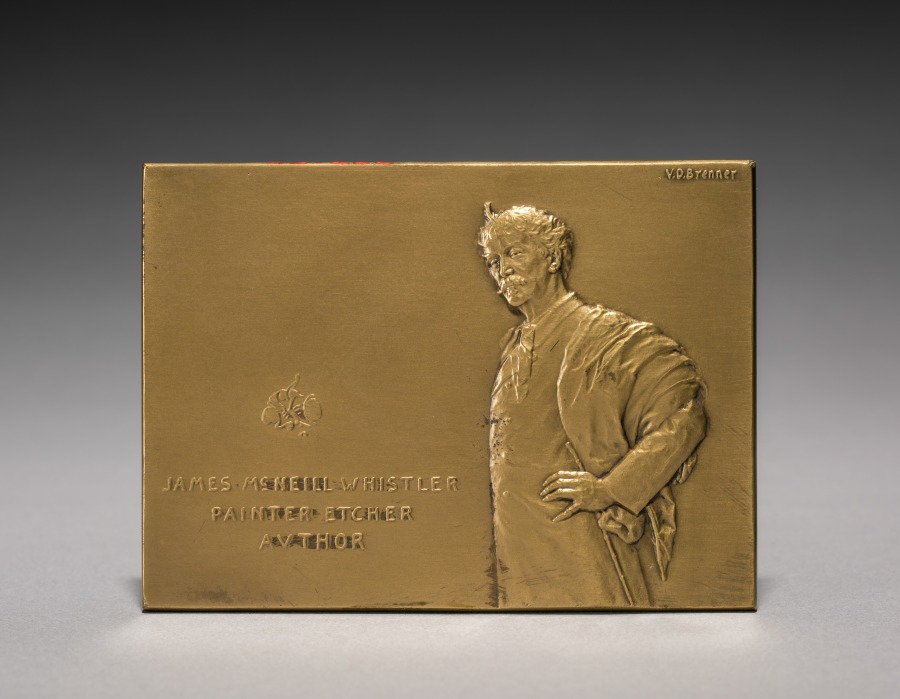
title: Whistler Medal (obverse)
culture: America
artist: Victor D. Brenner (American, 1871–1924)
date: 1900s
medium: bronze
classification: Metalwork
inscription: Whistler's butterfly monogram and the inscription: "JAMES MCNEILL WHISTLER"/" PAINTER ETCHER"/" AVTHOR"; above, signed: "V. D. Brenner."